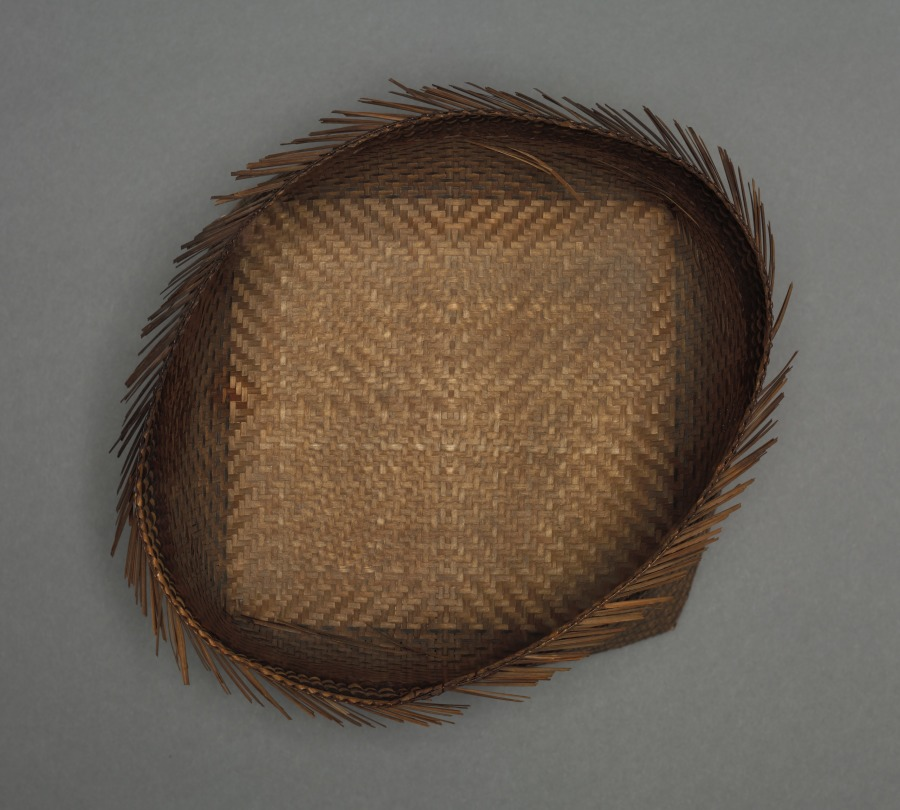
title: Hat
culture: Africa, Central Africa, Democratic Republic of the Congo, Mangbetu, 20th century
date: before 1929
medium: Plant fibers and dye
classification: Garment